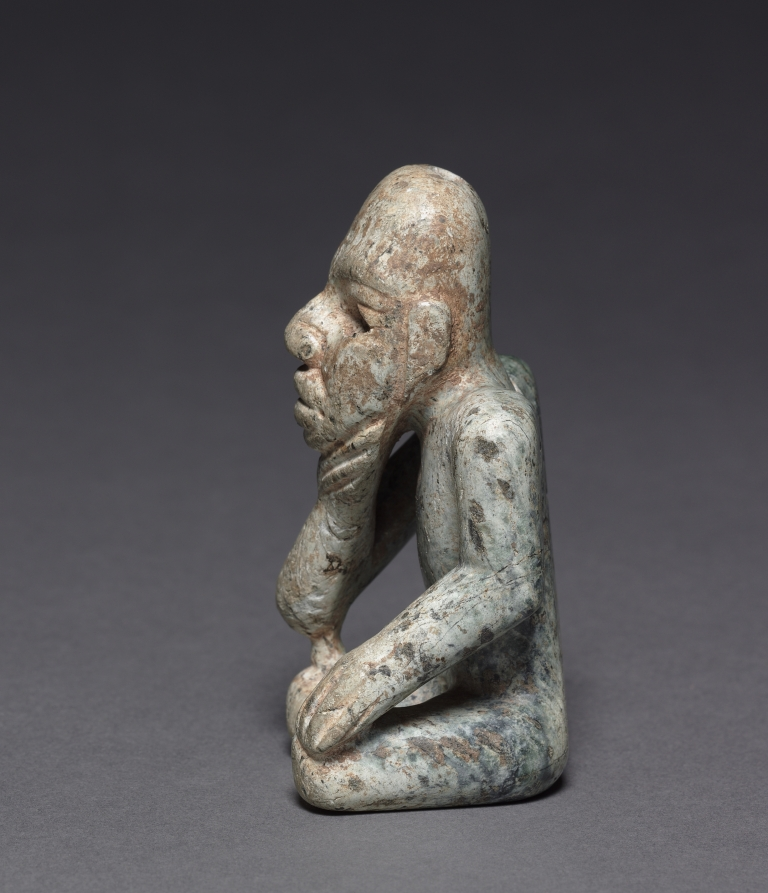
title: Seated Figure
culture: Mesoamerica, Mexico, Olmec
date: 1200–300 BCE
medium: jade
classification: Jade